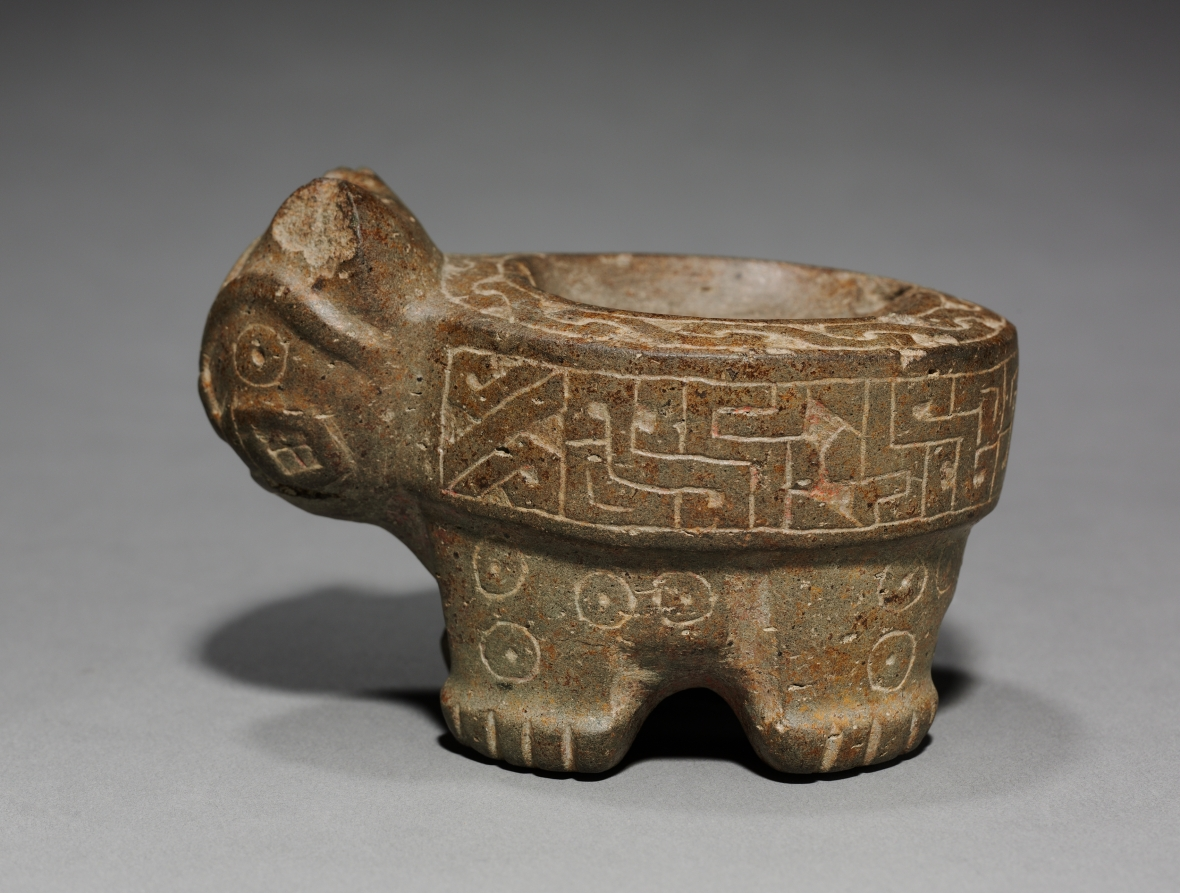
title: Feline Mortar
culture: Peru, North Highlands, Pacopampa(?), Chavín style (900-200 BCE)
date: 700–1 BCE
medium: stone, pigment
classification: Stone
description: Size suggests that this Chavín-style mortar was not used to grind bulky staples like corn, but instead pigments or plant hallucinogens used in religious rites to achieve spiritual insight and communion with cosmic forces. This may come from Pacopampa, a site in the northern highlands where elites adopted Chavín deities and worshiped them alongside local deities. These small sculptures illustrate the appeal and the spread of Chavín religion.